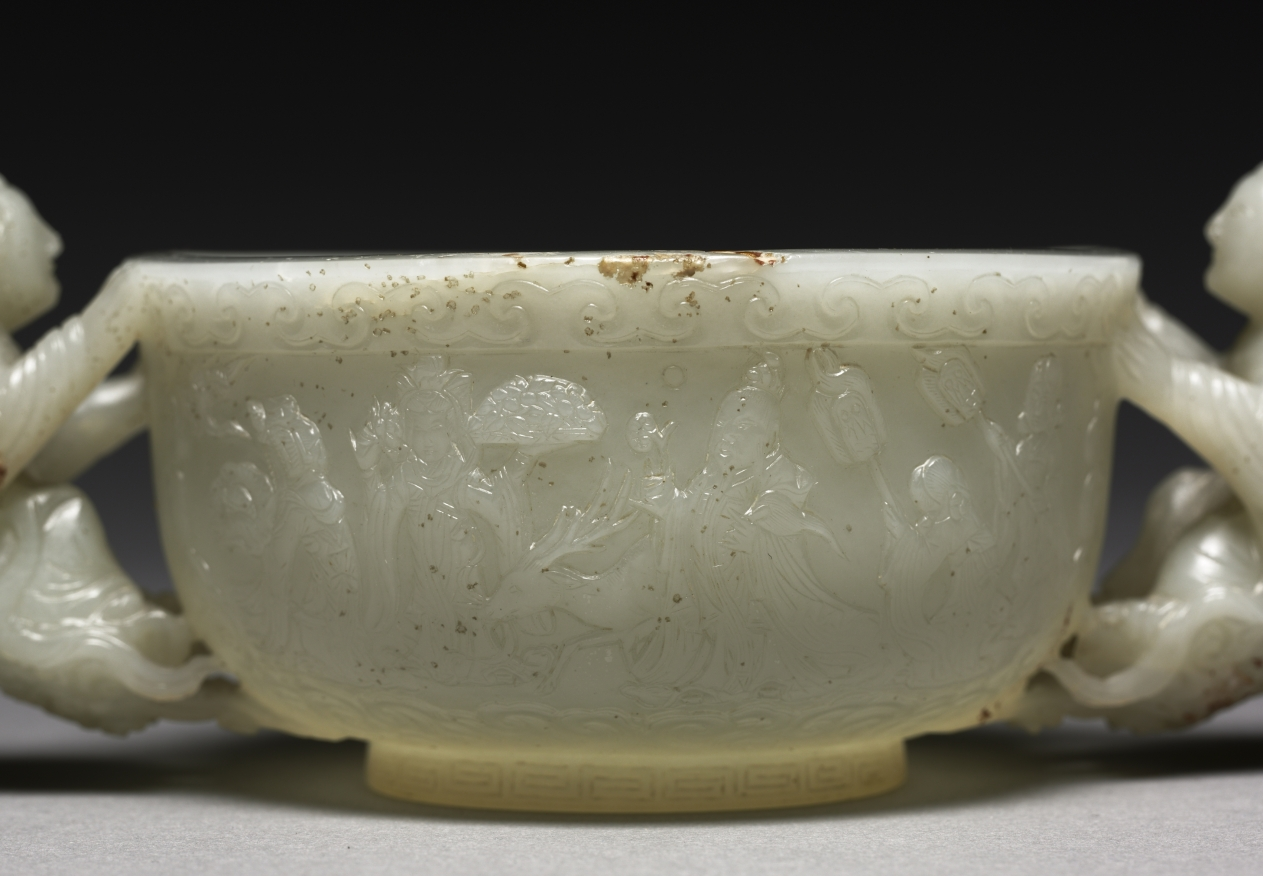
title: Cup with Daoist Figures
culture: China, Qing dynasty (1644–1911), Qianlong period (1736–95)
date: 1736–95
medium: Pale greenish-white jade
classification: Jade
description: During the Qing dynasty, Suzhou’s best products were sent north to the capital. Those that met imperial approval were sometimes graced with Qianlong’s mark, added by calligraphers and jade workers at court. The lack of a Qianlong mark on the Cleveland cup suggests that it might not have reached the court. Previously dated to the Yuan dynasty (1271–1368), new scholarship dates this cup to the Qing period.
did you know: Two female immortals serve as handles, while a Daoist procession with immortals, musicians, and attendants winds around the body of the cup.